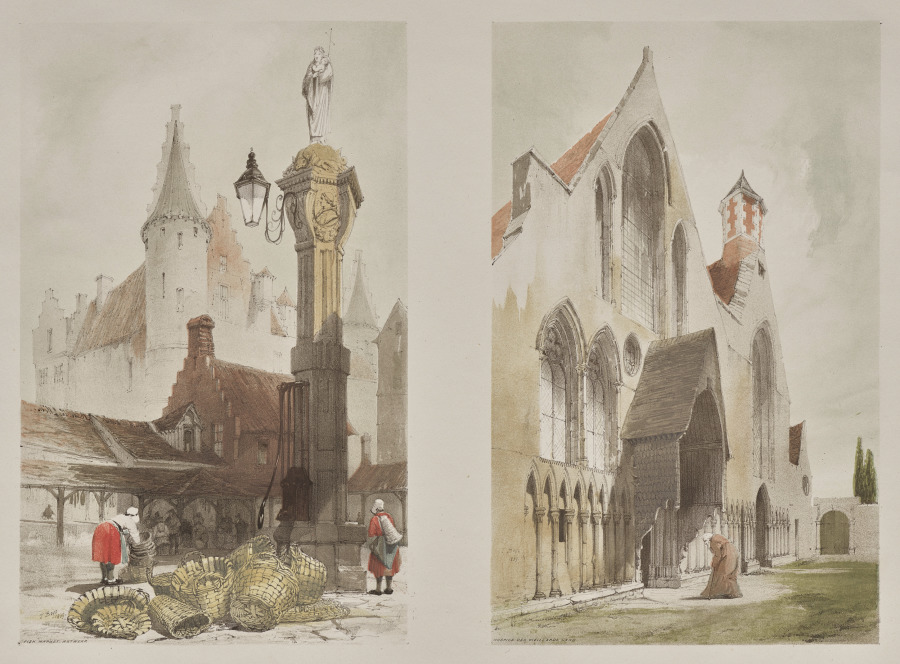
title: Picturesque Architecture in Paris, Ghent, Antwerp, Rouen: Hospice des Vieillards, Ghent, Belgium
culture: England, 19th century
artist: Thomas Shotter Boys (British, 1803–1874)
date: 1839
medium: lithograph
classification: Portfolio